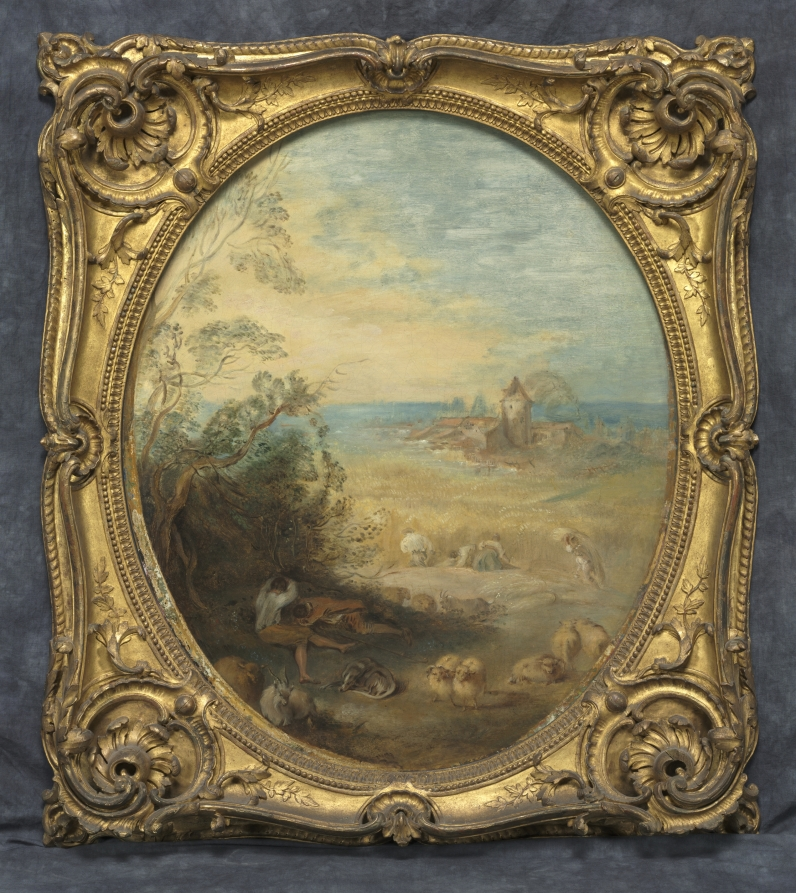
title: Summer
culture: France, 18th century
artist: Jean-Baptiste Pater (French, 1695–1736)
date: c. 1720–1736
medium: oil on canvas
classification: Painting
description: Spring and Summer are two scenes from a series of the four seasons. Both Autumn and Winter are now in the Museu d'Art de Catalunya in Barcelona. These landscapes were originally a part of a screen or a decorative panel, as indicated by their floral borders and oval shape. The setting of Spring is believed to be the grounds of Montmorency, the country estate of Pierre Crozat (1665-1740), a wealthy financier and art collector in early eighteenth-century Paris. The walkway is very similar to other scenes by Watteau known to depict the estate of his close friend and patron Crozat. As a student of Watteau, Pater would have also been familiar with this setting. Summer counters Spring's aristocratic leisure by depicting rural labor. However, befitting the work's decorative origins, Pater's scene belongs to the tradition of the timeless pastoral. More idyllic than a statement about class differences, the reapers peacefully gather sheaves of wheat as shepherds rest with their flocks in the foreground.